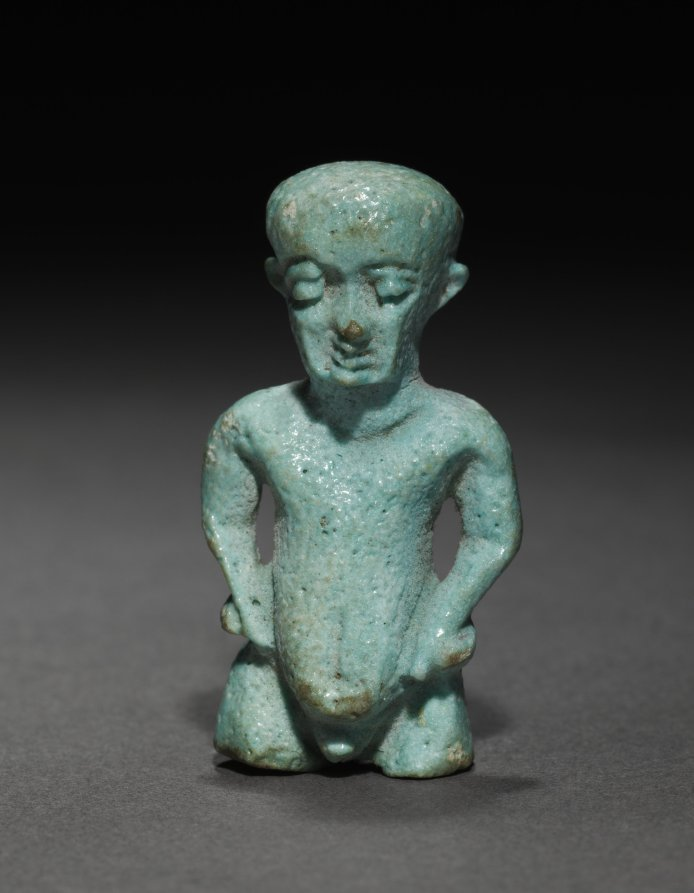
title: Amulet of Pataikos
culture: Egypt, Greco-Roman period (332 BCE–395 CE), Ptolemaic dynasty (305–30 BCE)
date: 305–30 BCE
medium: pale blue faience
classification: Amulets